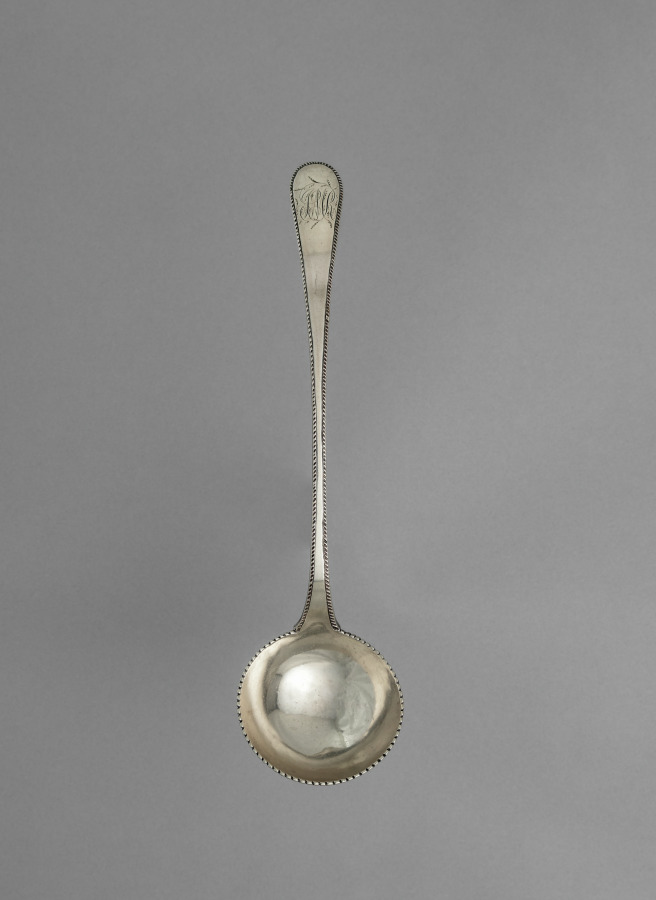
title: Soup Ladle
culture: America, New York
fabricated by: John Burt Lyng (American, 1785)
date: c. 1780–1785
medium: silver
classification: Silver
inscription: engraved "SMR" in script on top of handle end.